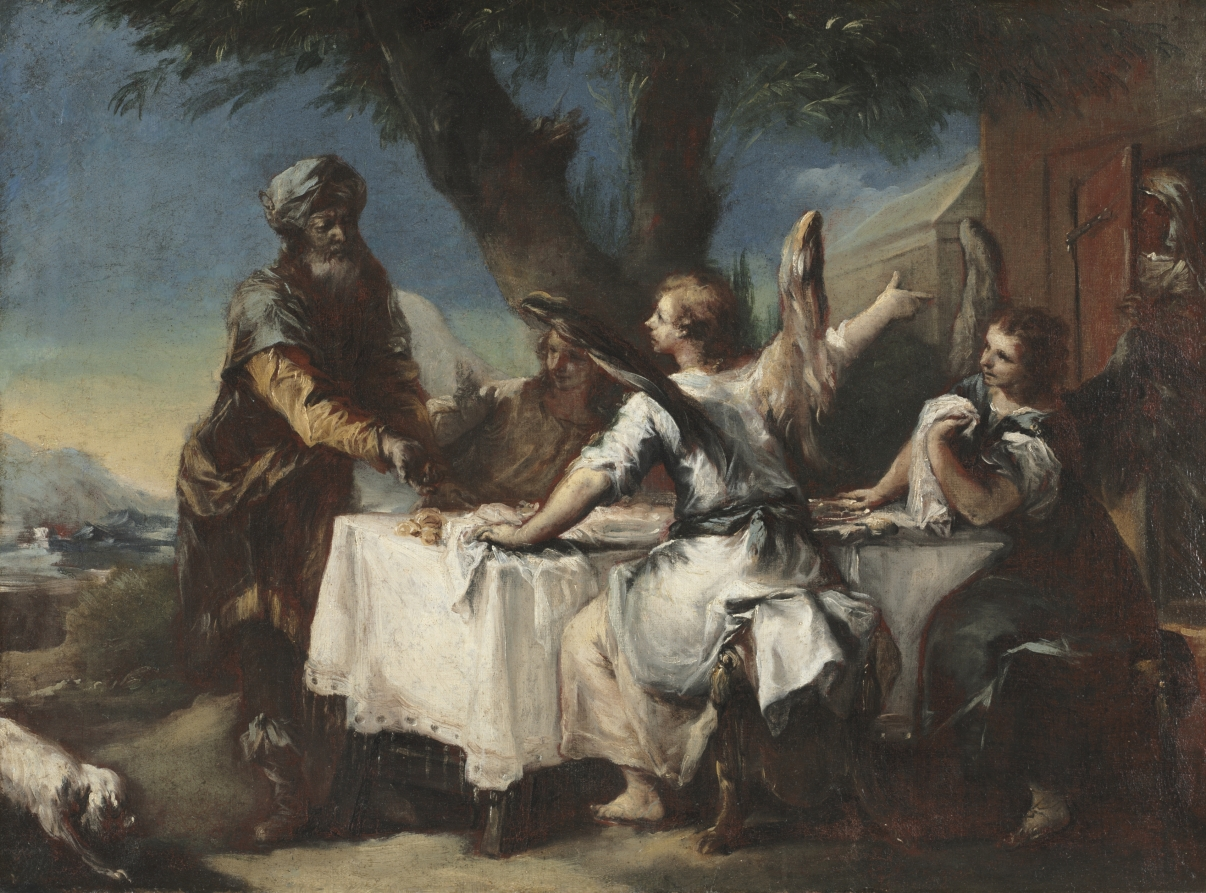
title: Abraham Welcoming the Three Angels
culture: Italy, 18th century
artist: Francesco Guardi (Italian, 1712–1793)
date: 1750s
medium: oil on canvas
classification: Painting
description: Three of the four pictures in the series depict episodes from the life of the Old Testament figure of Abraham, beginning with the angels appearing to Abraham. According to Genesis 18, Abraham met three men at midday, and, recognizing that they were angels, humbly bowed down to them with his face touching the ground. The encounter incongruously takes place before a marble, classical portico in which a woman lurks, presumably his wife Sarah.